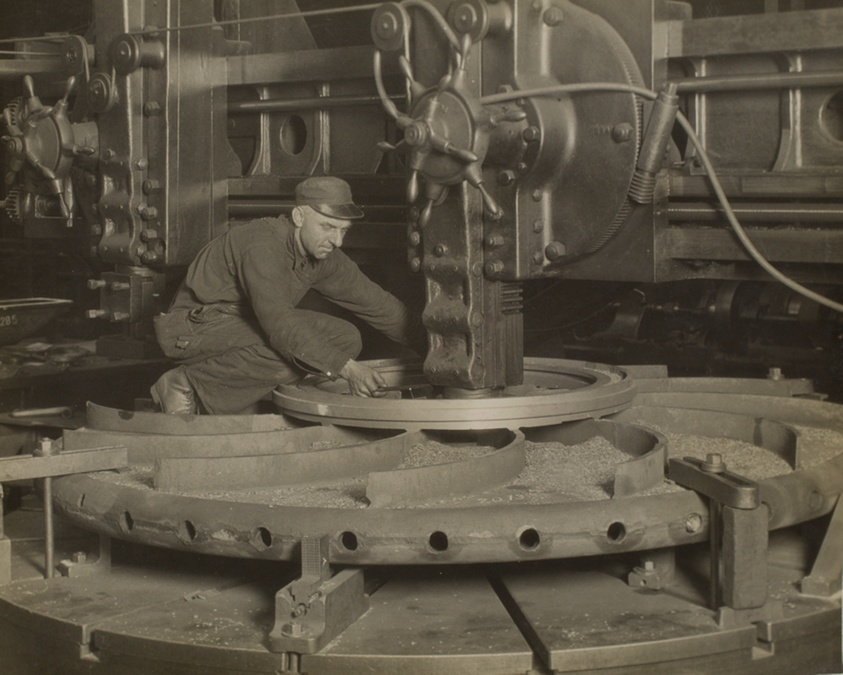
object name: Photograph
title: Worker at Grinding Machine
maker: Lewis Wickes Hine (American, 1874–1940)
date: 1930/31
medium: Gelatin silver print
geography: United States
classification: photograph; photography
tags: documentary